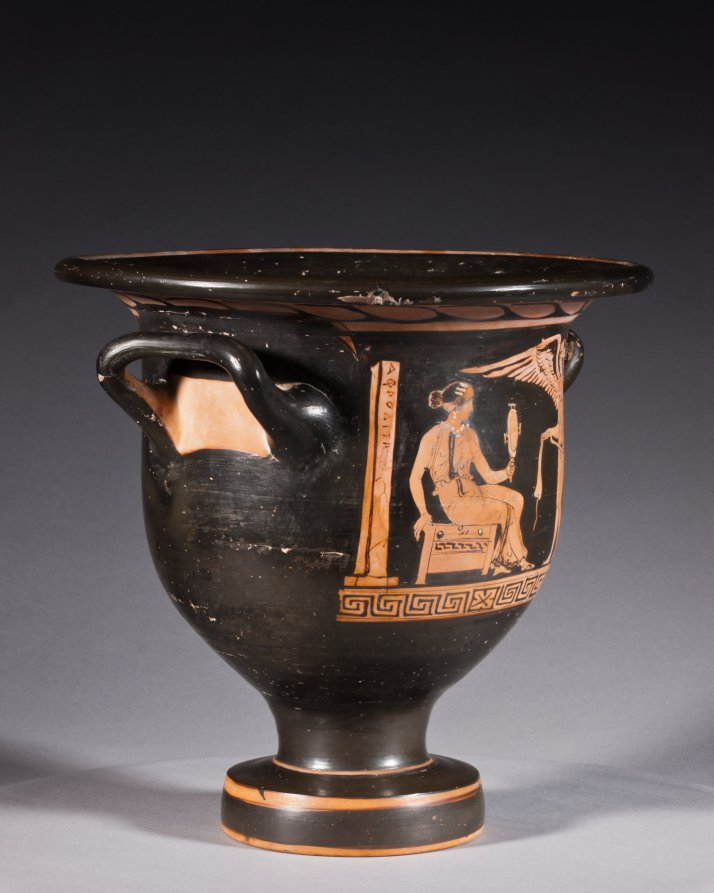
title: Red-Figure Bell Krater (Mixing Vessel): Aphrodite and Eros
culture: South Italian, Apulian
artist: attributed to Graz Painter (South Italian, Apulian, active c. 380–360 BCE)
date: c. 370–360 BCE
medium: ceramic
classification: Ceramic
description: This small mixing vessel shows a finely dressed woman seated on a chest and holding up a mirror to admire herself. Before her stands Eros, the winged god of love, holding a ribbon or sash. Behind the woman stands a pillar with the inscription ΑΦΡΟΔΙΤΗ, or APHRODITE, the goddess of love. Such labels are rare on vases, and scholars debate whether this names the woman shown as Aphrodite herself, with her son Eros, or a bride envisioning herself as Aphrodite, just before her wedding.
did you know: The dancing nude youths on the reverse are unusual; typically they would be standing and draped.